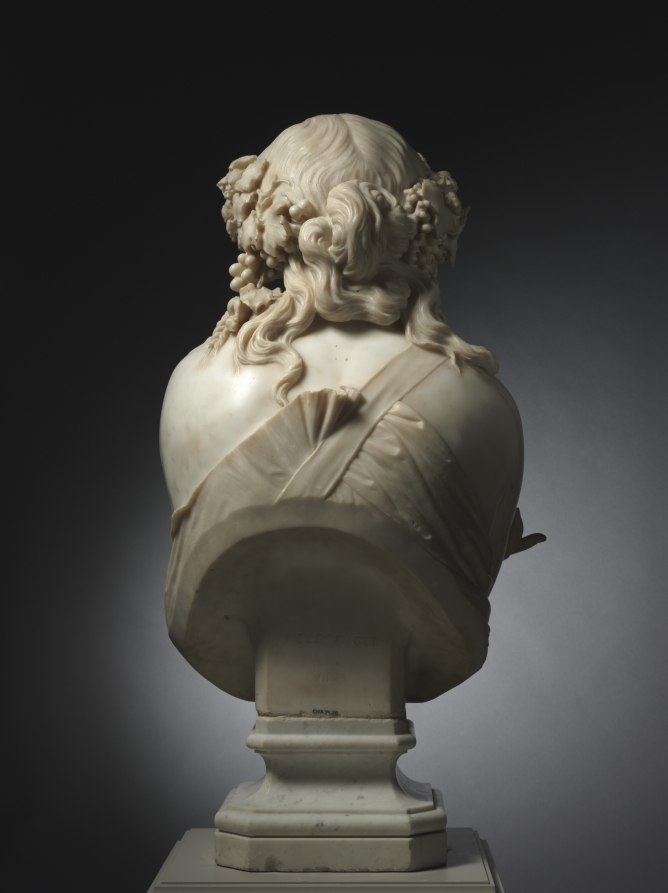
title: Bacchante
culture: France, 19th century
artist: Jean-Baptiste Clésinger (French, 1814–1883)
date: 1863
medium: marble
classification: Sculpture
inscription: signed below, on back of bust: J. Clésinger / Rome / 1836.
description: The French sculptor Auguste Clésinger spent much of his life in Rome, where this bust was created in 1863. He is particularly noted for the creation of sensual subjects in marble, such as this obviously inebriated Bacchante, a female companion of Bacchus, the Roman god of wine.